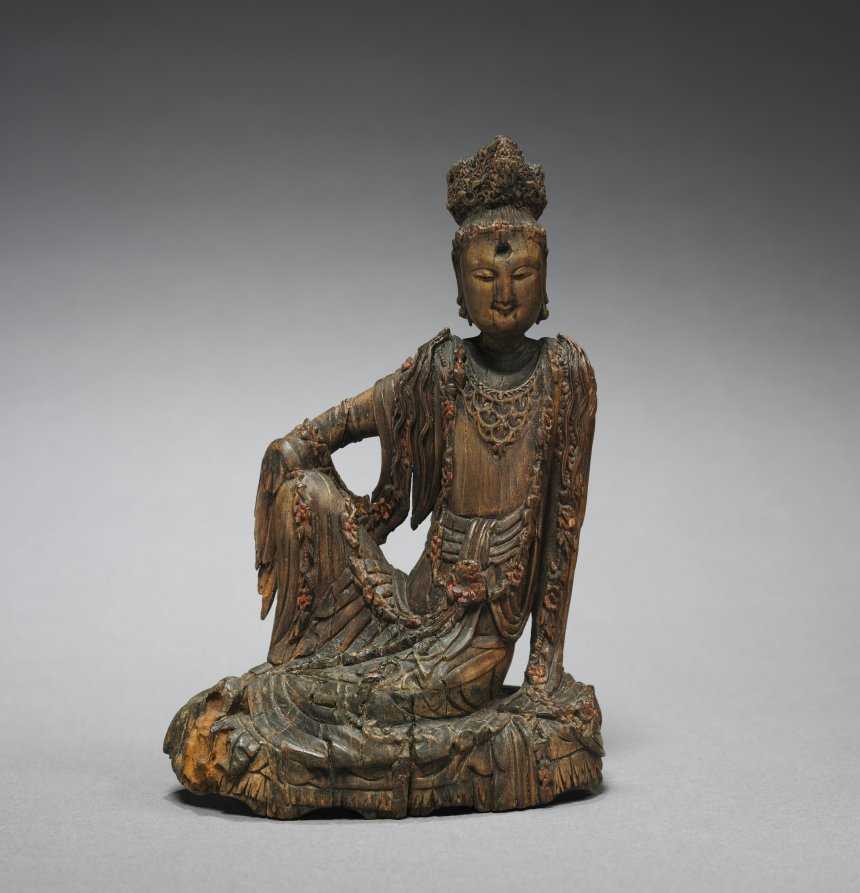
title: Potalaka Guanyin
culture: China, Five dynasties (907-960)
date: 900s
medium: Carved sandalwood with traces of paint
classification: Sculpture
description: This portable figure of Guanyin, the Bodhisattva of Compassion who vowed to stay on earth to help human beings, is carved of precious sandalwood. It is lavishly covered with garlands of flowers that retain traces of the original red paint. The small sculpture may have been used in a private devotional context.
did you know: Mount Potala is the mythical home of the bodhisattva Avalokiteśvara, called Guanyin in Chinese.